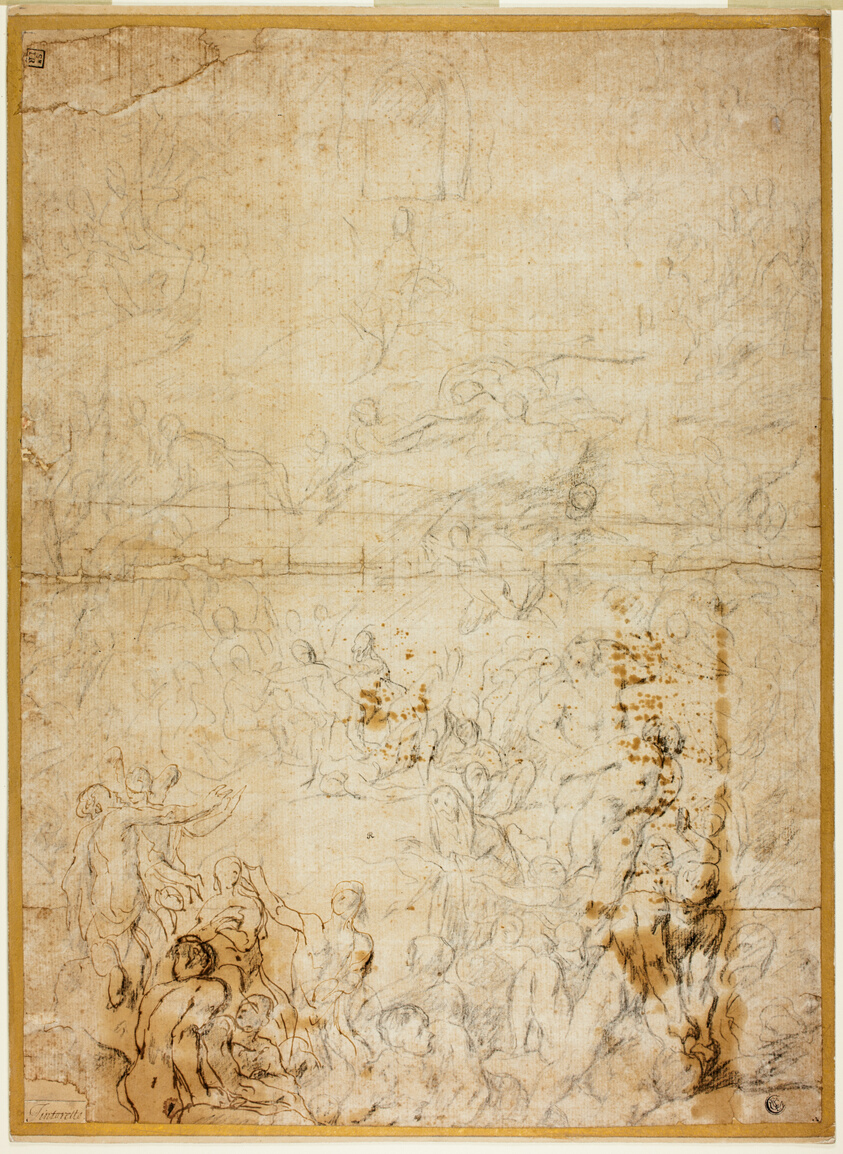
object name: Drawing and Watercolor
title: Last Judgement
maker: Jacob Jordaens (Flemish, 1593-1678); or Anthony van Dyck (Flemish, 1599-1641); or Jacopo Negretti, called Palma il Giovane (Italian, 1480-1528); or Peter Paul Rubens (Flemish, 1577-1640); or Jacopo Robusti, called Tintoretto (Italian, 1519-1594)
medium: Black chalk, with pen and brown ink, on tan laid paper, laid down on tan wove paper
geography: Italy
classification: graphite; drawings (visual works); prints and drawing